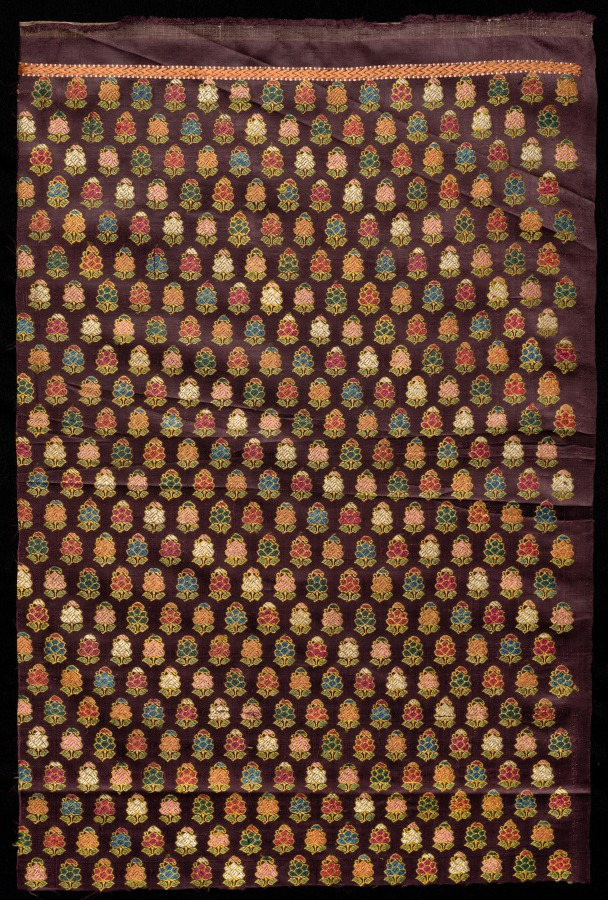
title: Fragment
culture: India, 19th century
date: 1800s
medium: brocade, "himru"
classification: Textile